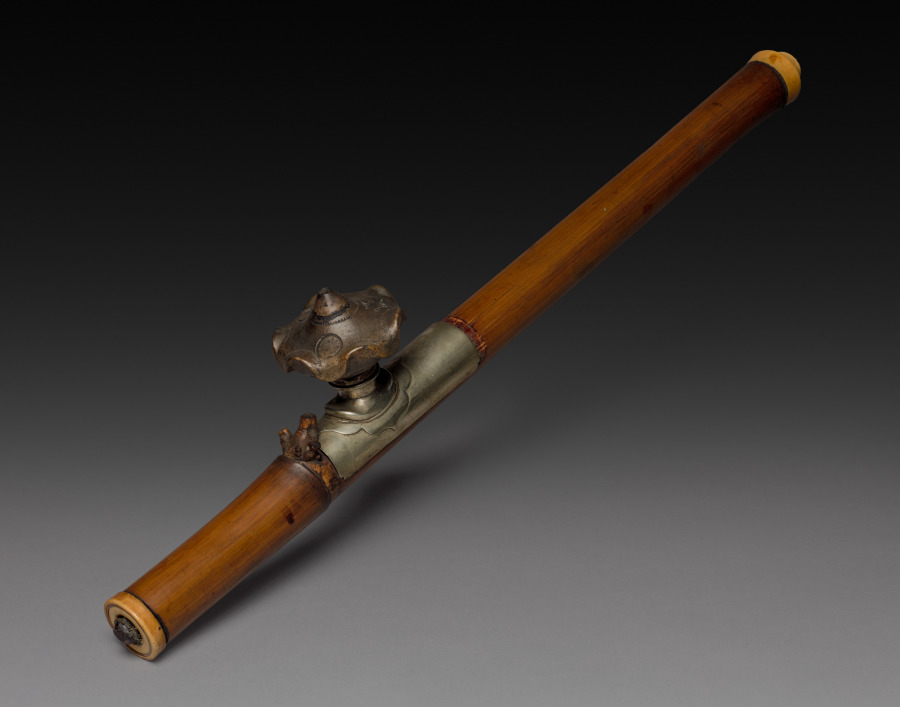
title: Opium Pipe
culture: China, Qing dynasty (1644-1911)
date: 1800s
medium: wood and ivory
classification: Miscellaneous